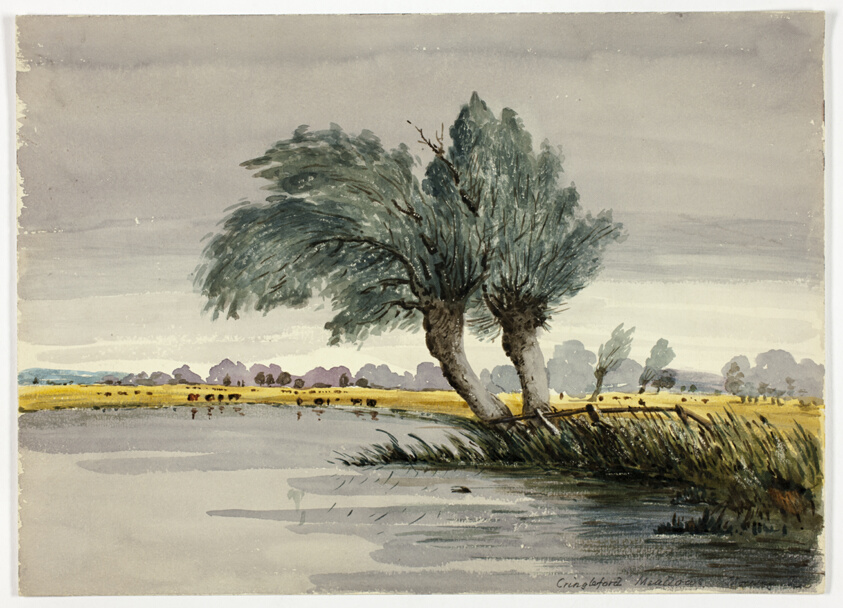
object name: Drawing and Watercolor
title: Cringleford Meadows-Morning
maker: Unknown Artist (British, 19th century); or possibly after Robert Leman (English, 1799-1863)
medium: Watercolor on ivory wove paper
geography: United Kingdom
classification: gouache; drawings (visual works); prints and drawing